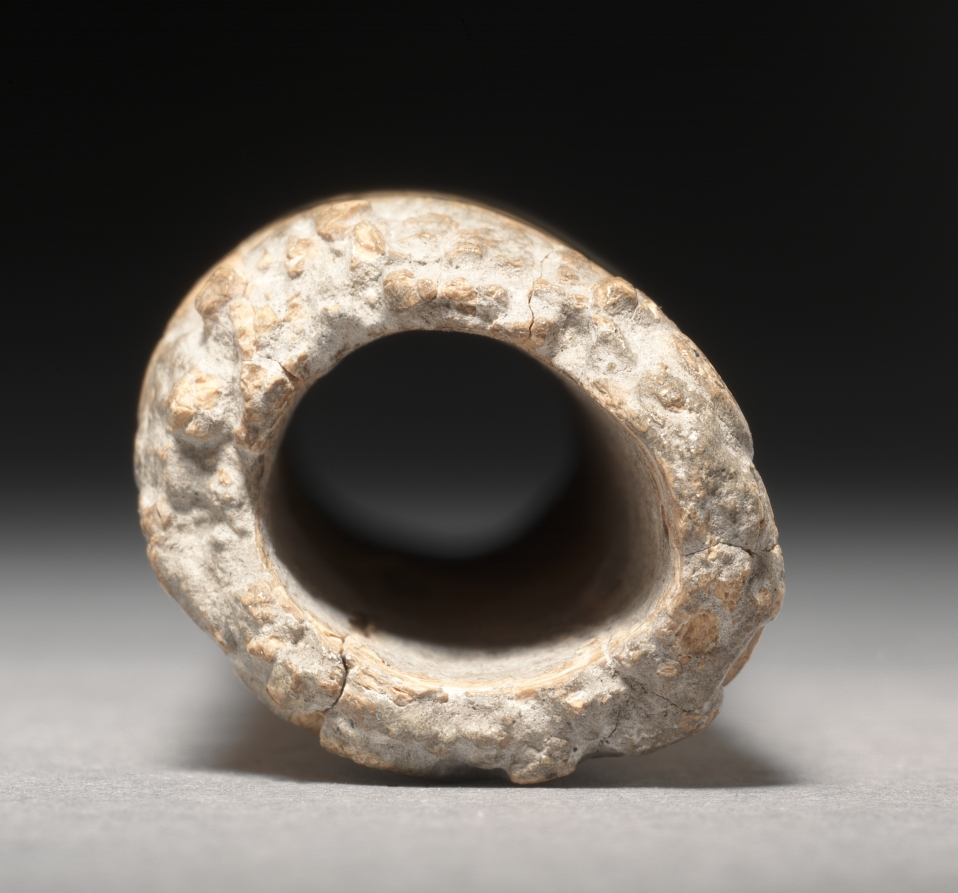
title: Carved Tube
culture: Mexico, Oaxaca, Mixtec, 13th-16th century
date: c. 1200–1519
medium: bone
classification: Jewelry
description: Carved in spiral registers, the ornamentation on this bone tube resembles Mixtec painting, both in codices (screenfold books) and architectural murals.